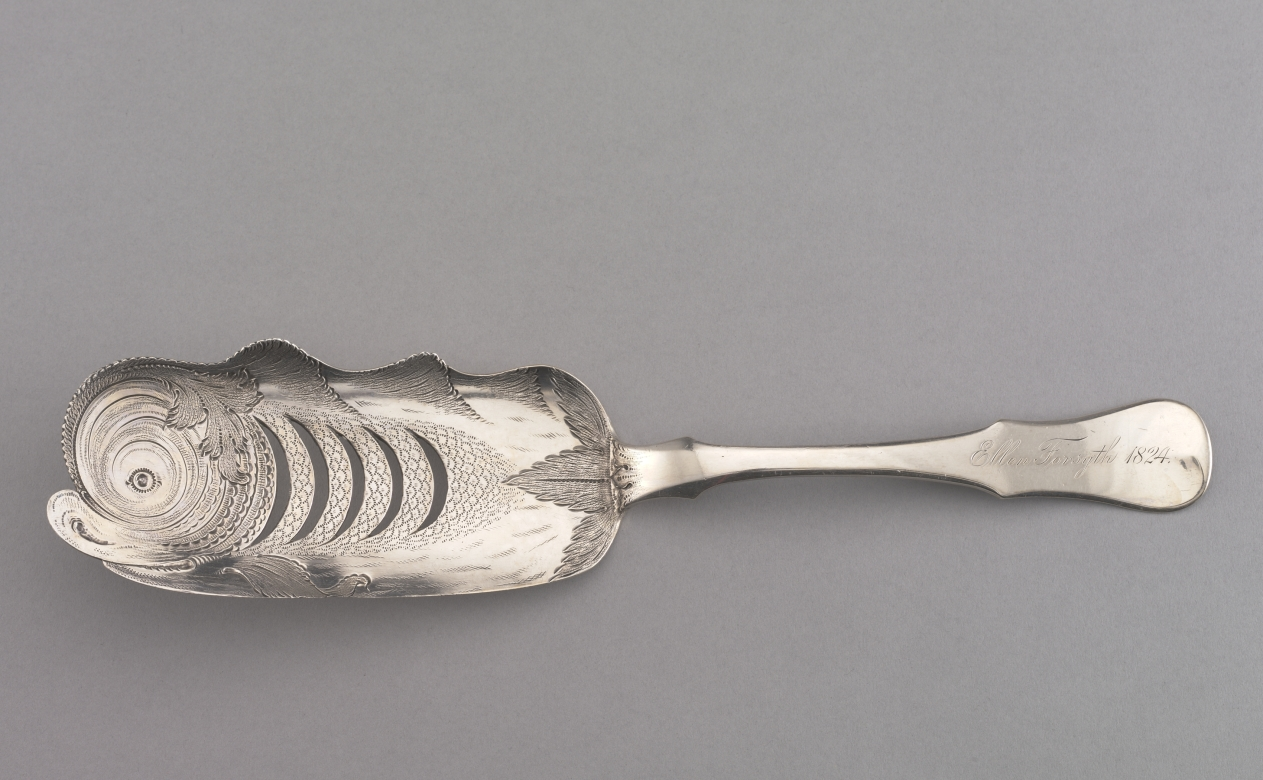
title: Fish Slice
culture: America, Maryland, Baltimore, 19th century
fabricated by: Samuel Kirk (American, 1793–1872)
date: c. 1824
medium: silver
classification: Silver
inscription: engraved: "Ellen Forsyth 1824" in script along top of handle end.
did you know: Look closely at the delicate details of this utensil. Often the decoration reveals the function of these special pieces. For what purpose do you think this was used?